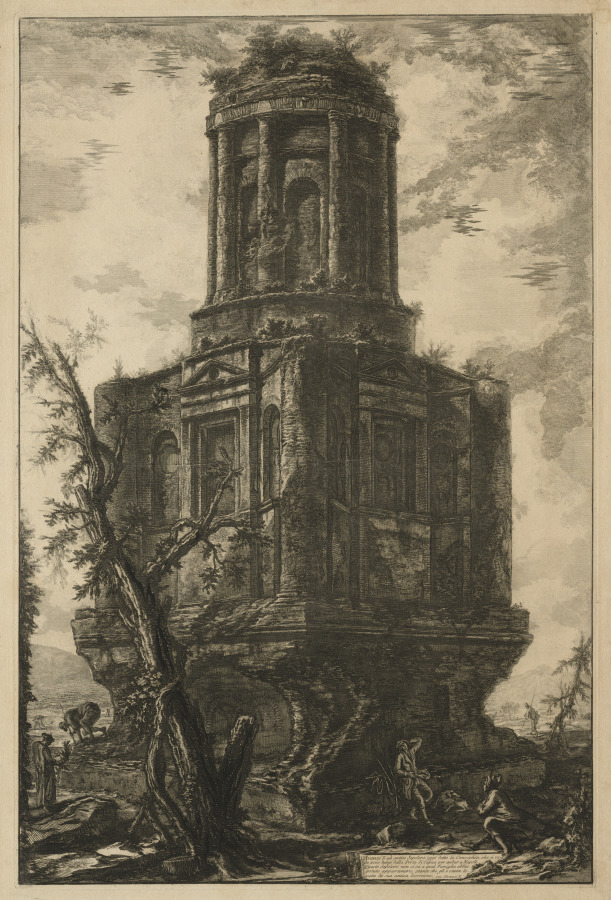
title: Views of Rome: The Tomb, called La Connocchia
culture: Italy, 18th century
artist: Giovanni Battista Piranesi (Italian, 1720–1778)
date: 1776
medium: etching and engraving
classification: Print